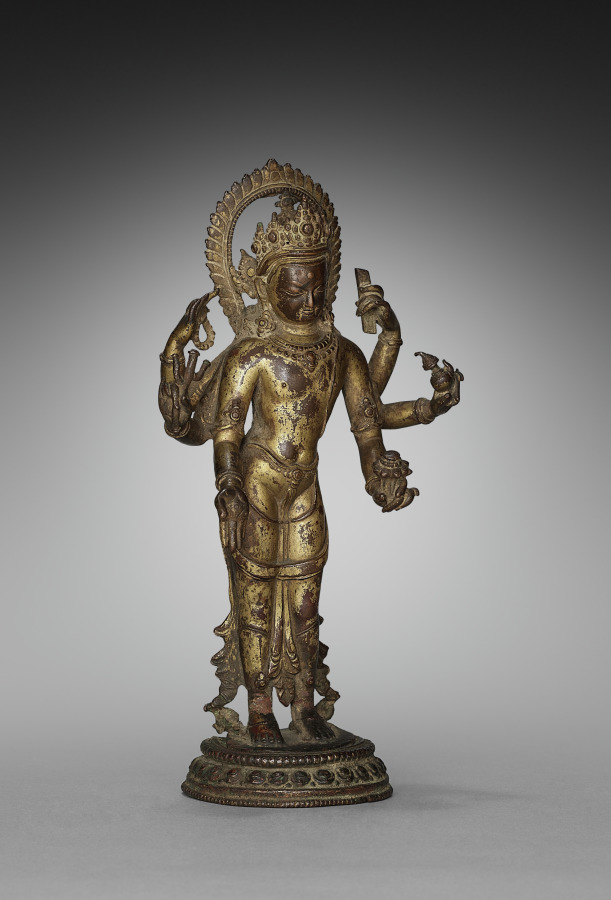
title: Lokeshvara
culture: Nepal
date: 1300s–1400s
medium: gilded copper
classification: Sculpture